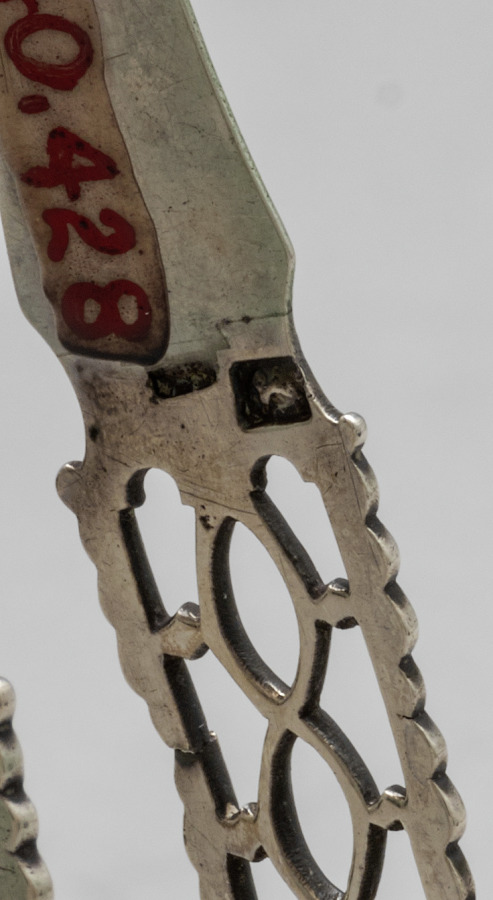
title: Sugar Tongs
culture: England, 18th century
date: 1775–1799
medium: silver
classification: Silver